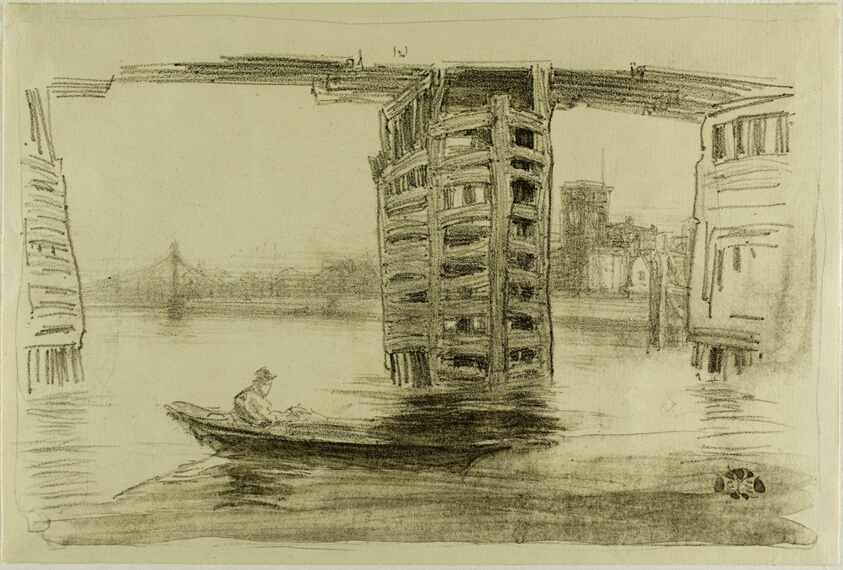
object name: Print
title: The Broad Bridge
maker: James McNeill Whistler (American, 1834-1903)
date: 1878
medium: Lithotint, in brown ink, with scraping, on tan laid paper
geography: United States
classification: lithotint; lithograph; print; prints and drawing; paper